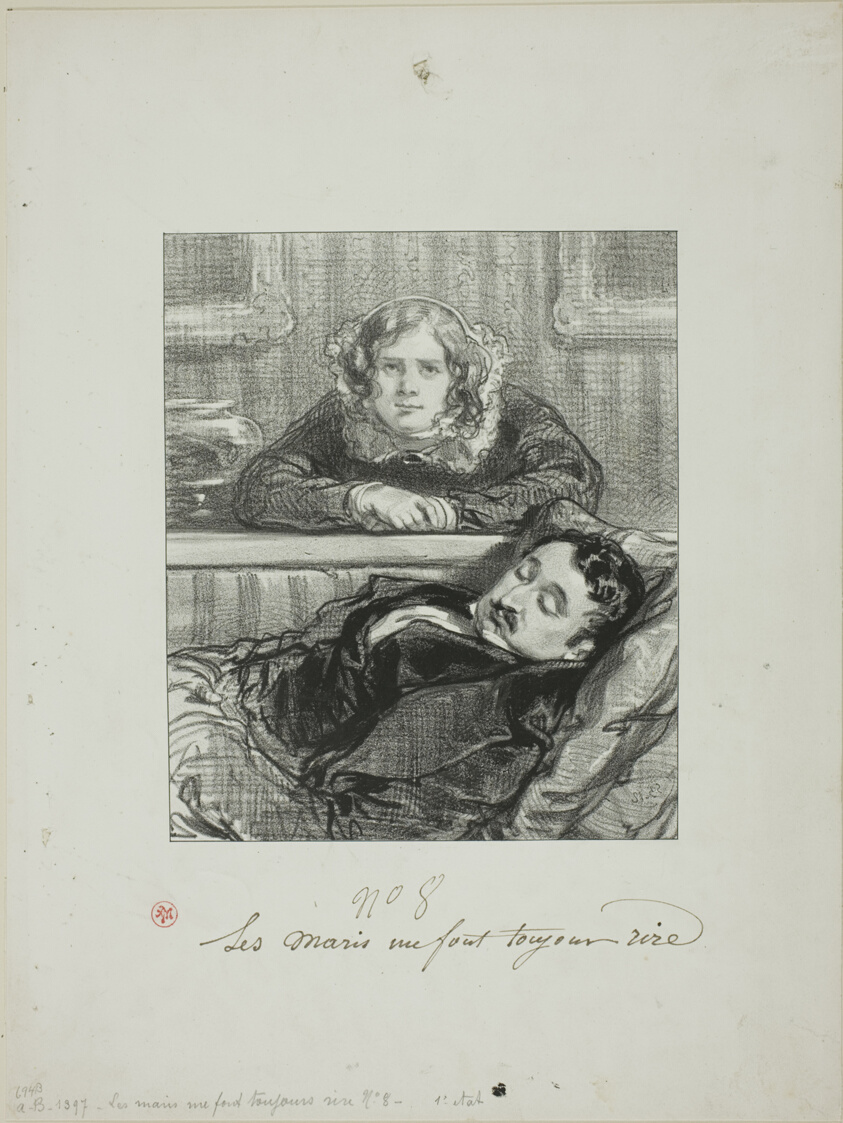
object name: Print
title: Husbands Always Make Me Laugh: He goes on the loose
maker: Paul Gavarni (French, 1804-1866)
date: 1853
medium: Lithograph in black on ivory wove paper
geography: France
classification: lithograph; print; prints and drawing